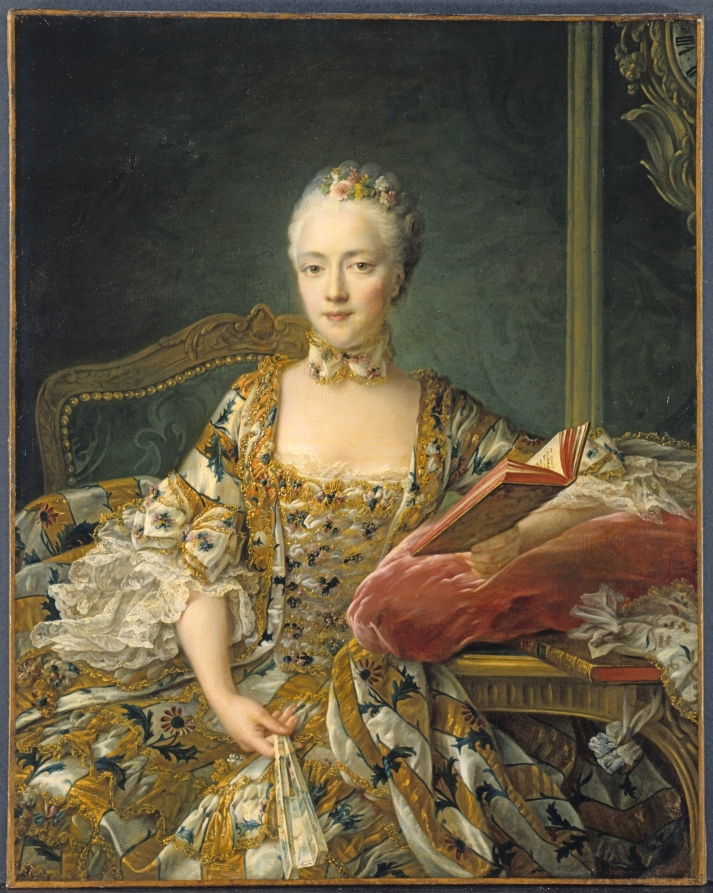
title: Portrait of the Marquise d'Aguirandes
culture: France, 18th century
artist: François Hubert Drouais (French, 1727–1775)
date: 1759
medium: oil on canvas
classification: Painting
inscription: Signed upper left: "Drouais fecit 1759"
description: Like many French portraitists active during the ancien régime, François-Hubert Drouais was skilled at veiling the physical imperfections of his subjects. This portrait certainly has this quality: the face has been idealized, smoothed, and perfected, but the focus of the painting is less on the Marquise and more on her elegant gown, which is a particularly fine rendering of eighteenth-century printed cloth, with the brilliant gold and white fabric strewn with meticulously detailed flowers and lace.